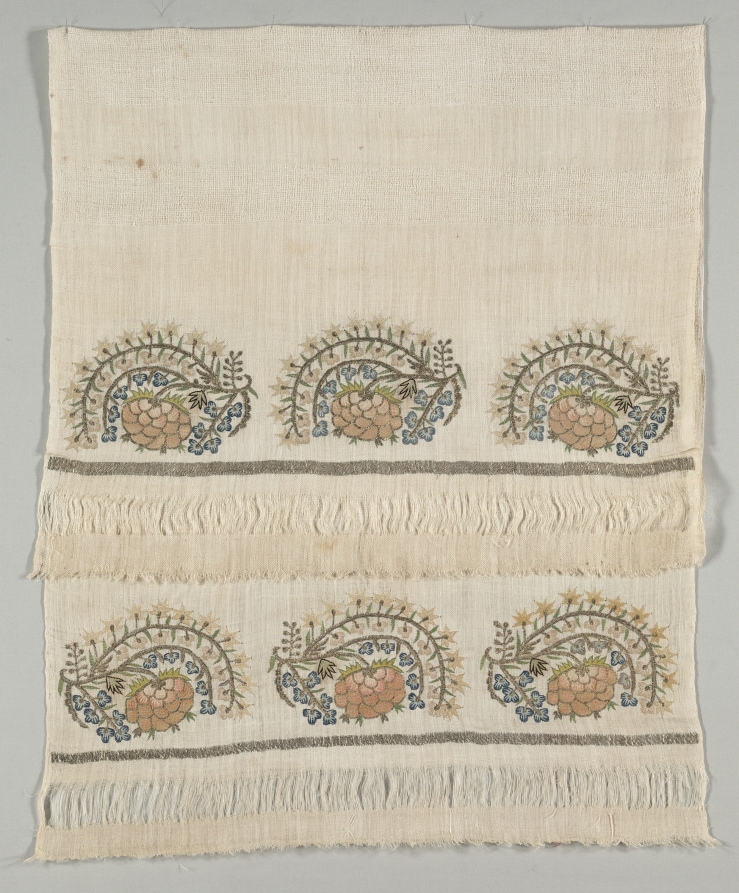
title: Embroidered Towel (Havlu)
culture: Turkey, 19th century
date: 19th century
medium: embroidery; silk and gold filé on linen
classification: Embroidery